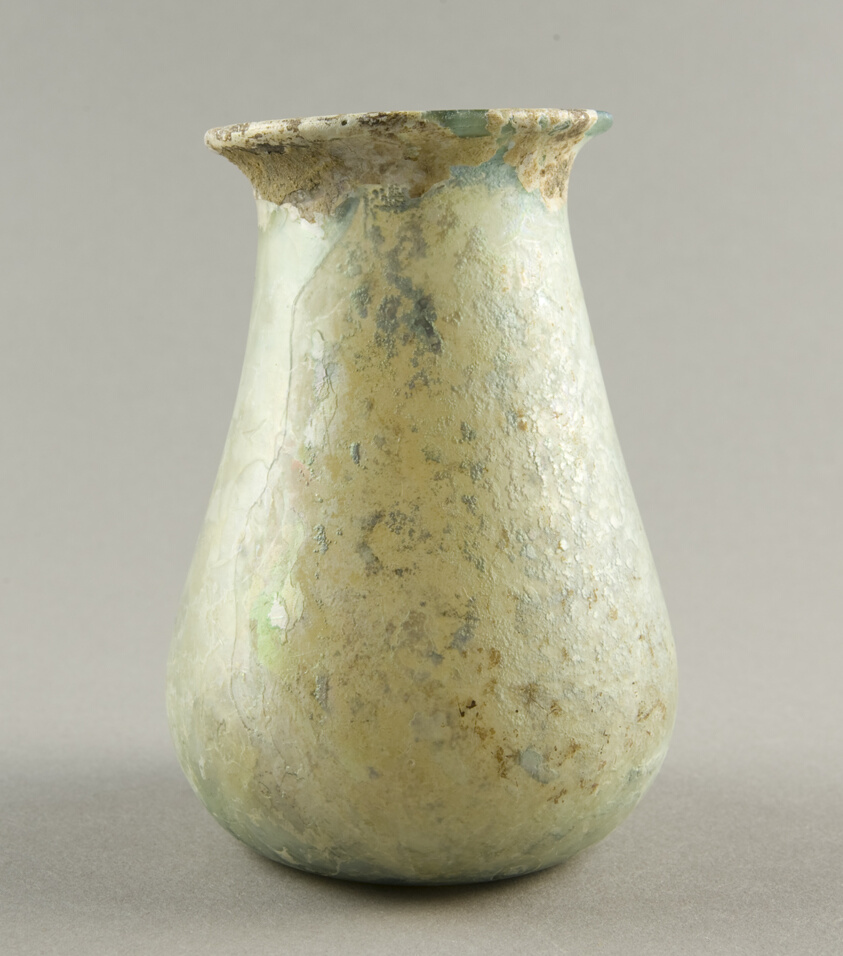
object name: Vessel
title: Beaker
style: syrian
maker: Roman; Levant or Syria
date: 1st century (?)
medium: Glass, blown technique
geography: Syria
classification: glass; vessel; ancient art